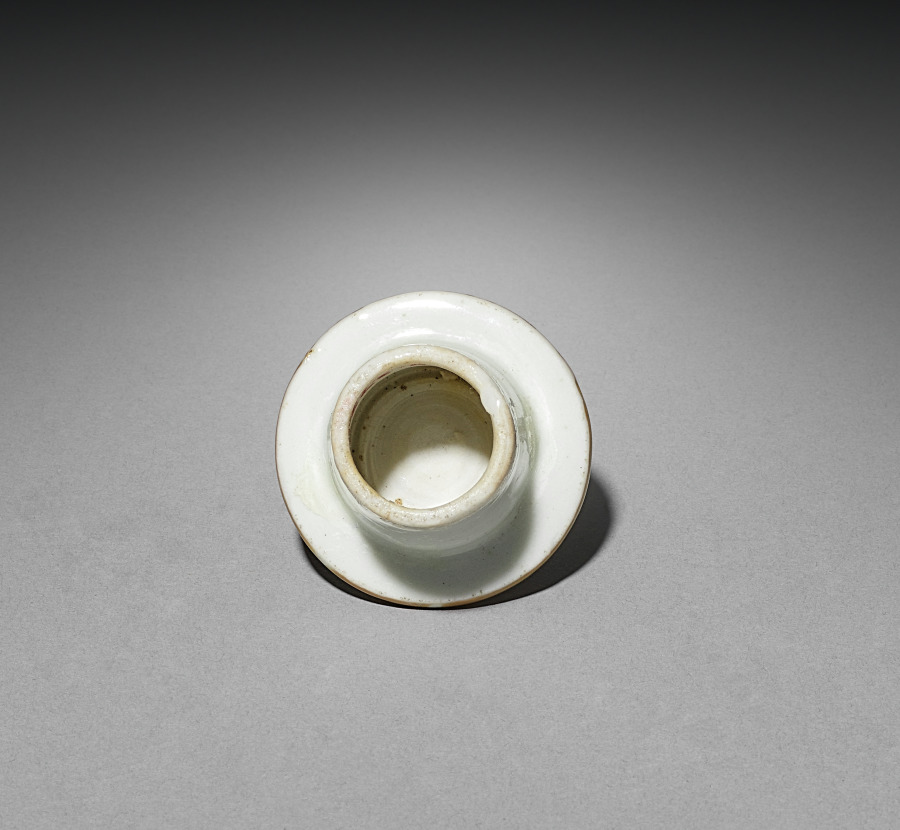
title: Sake Bottle with Three Figures (lid)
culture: Japan, Edo period (1615–1868)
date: late 1700s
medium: porcelain with overglaze enamel and gold decoration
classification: Ceramic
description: The bottle features three elegantly drawn figures: a beautiful woman, a young man, and a priest. The artist used a fine-haired brush to draw these figures in colored enamel onto the porcelain bottle, which had already been given a clear glaze. A final firing fused the enamel to the form. The name derives from the port of Imari from where Japanese porcelains were shipped to other cities in Japan, China, and Europe.